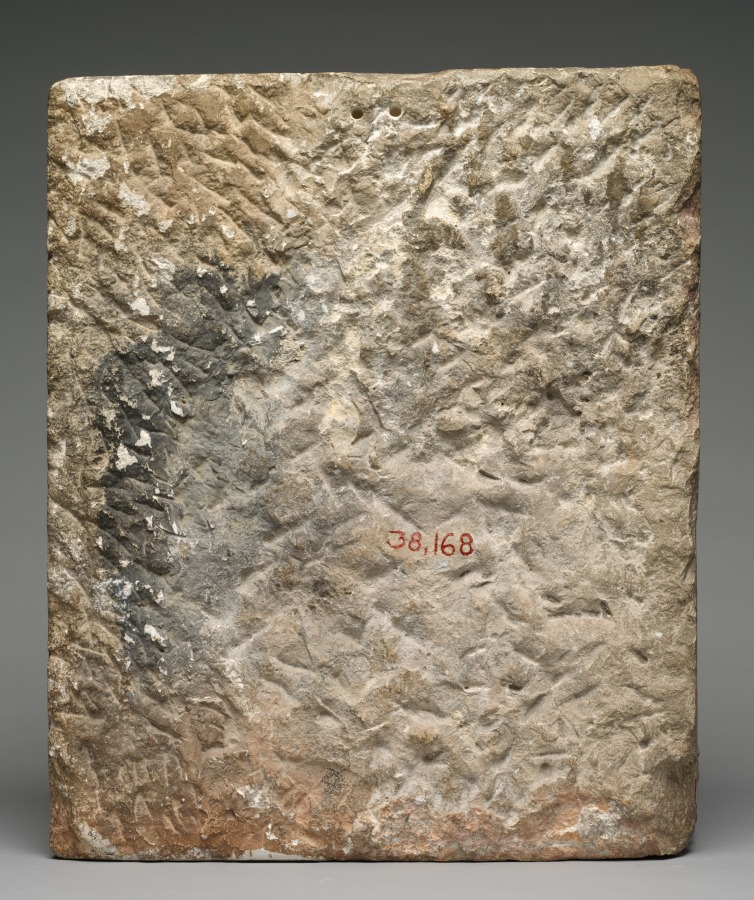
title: Temptation of Saint Anthony of Egypt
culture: France, c. 15th century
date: c. 1400s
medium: stone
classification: Sculpture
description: Saint Anthony (AD 251–356) was a Christian monk from Egypt, revered since his death as a saint. Many of his tales are conveyed in the Golden Legend, a classic work of the Middle Ages containing lively tales of saints’ miracles written in a simple style for a wide audience. This scene illustrates the supernatural temptation faced by Saint Anthony during his retreat to the Egyptian desert. The saint is being tempted by hideous demons, which he resisted.